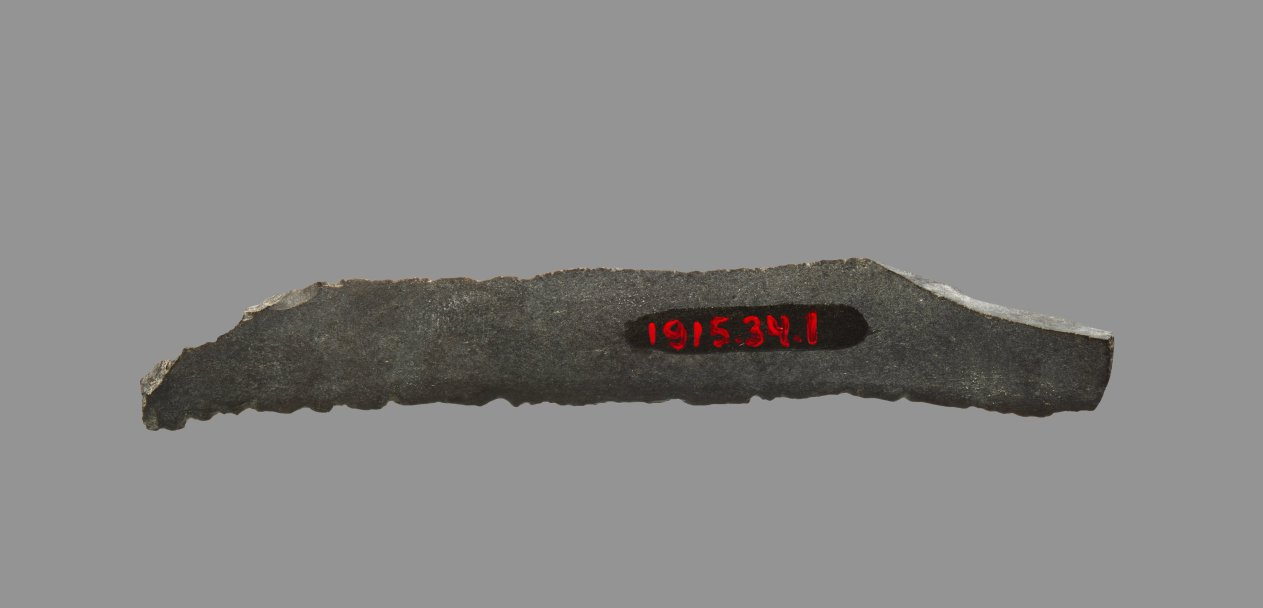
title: Sickle Blade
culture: Egypt, Middle Kingdom (2040–1648 BCE), Dynasty 12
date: 1980–1801 BCE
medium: flint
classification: Implements